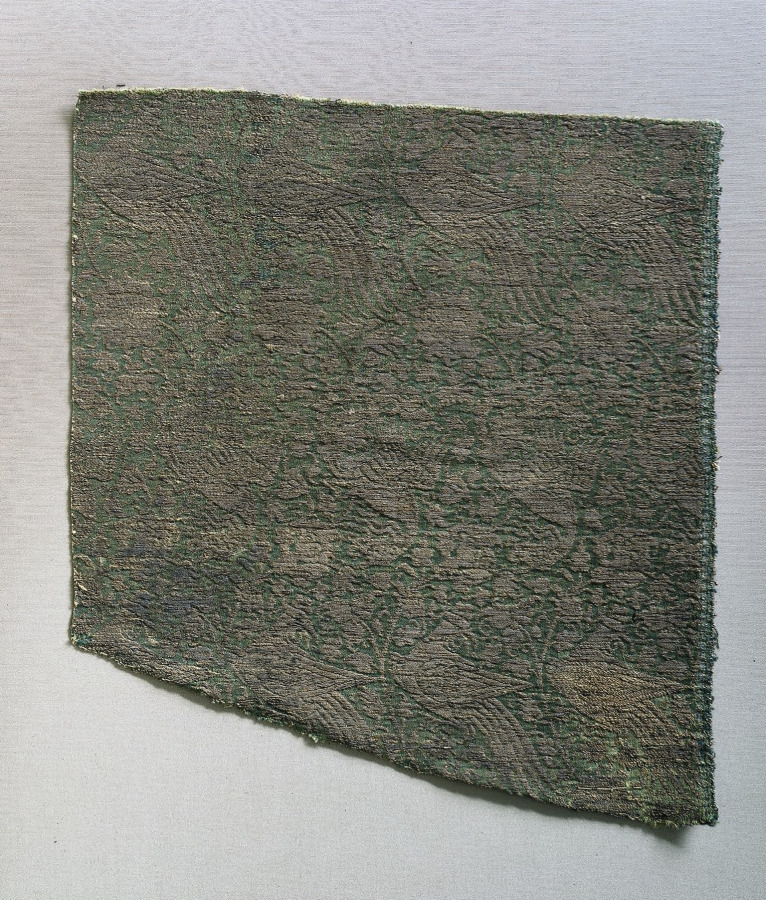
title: Lampas with phoenixes amid undulating vines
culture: Eastern Iran, Ilkhanid period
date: late 1200s-1300s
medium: lampas: silk, cotton, and gold thread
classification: Textile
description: The elegant design of standing or diving phoenixes among parallel, curving floral vines is based on Chinese textiles. The phoenixes are actually of two types (notice the difference in their tails). Their combination, probably an innovation of Yuan China (1279-1368), also appears on the embroidered canopy (cat. no. 60) in this exhibition. In the eastern Iranian world, Chinese motifs and patterns were incorporated into local designs beginning in the 1270s.